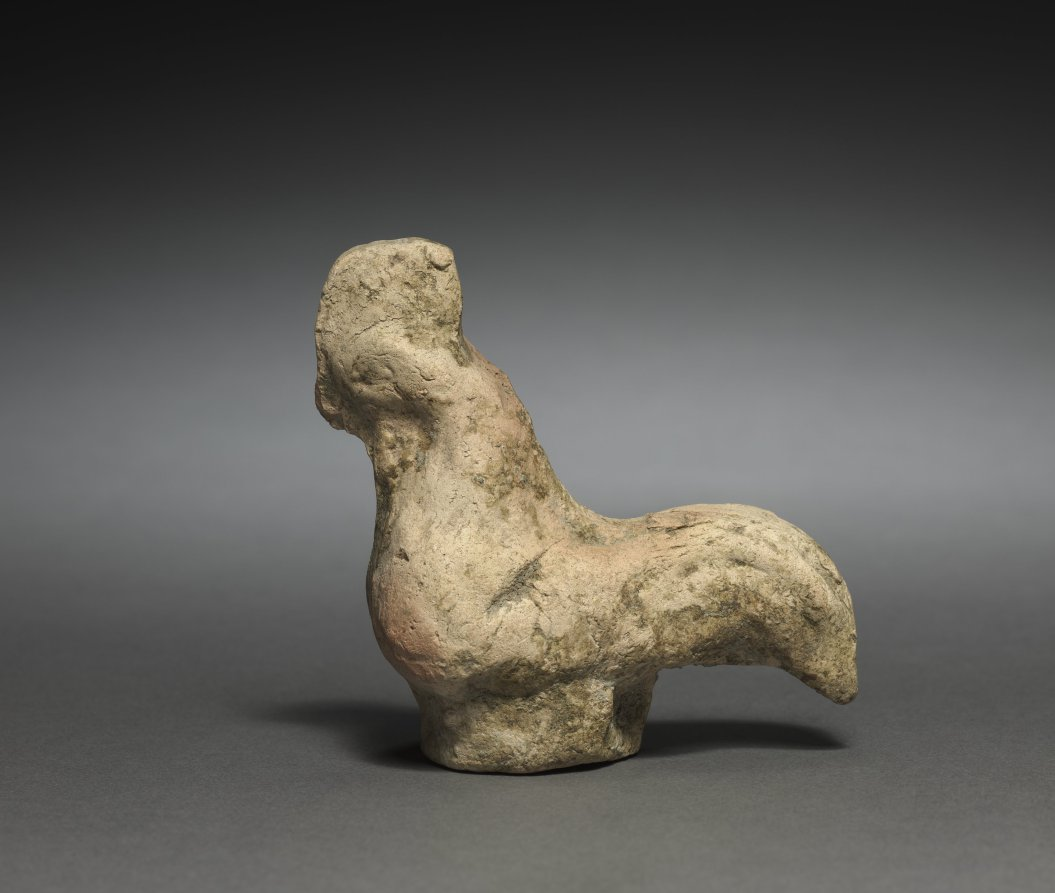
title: Figurine - Rooster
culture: Parthian Empire (247 BCE–224 CE)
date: 1–200 CE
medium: terracotta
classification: Sculpture